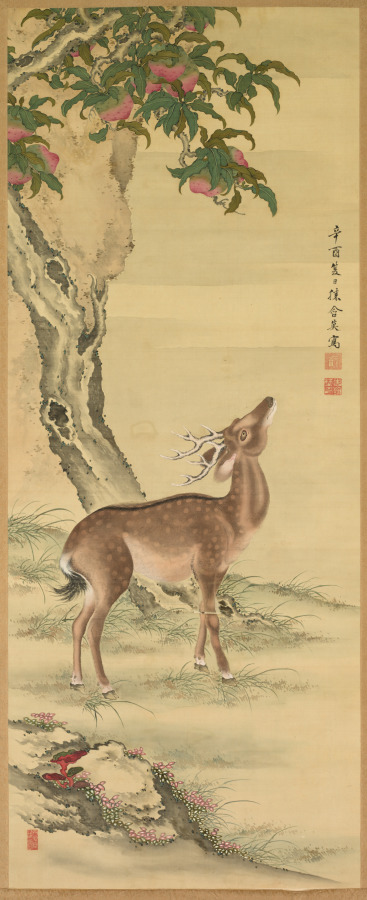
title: Symbols of Longevity: Deer under Peach and Pine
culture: Japan, Edo period (1615–1868)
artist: Toda Tadanaka (Japanese, 1761–1823)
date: 1801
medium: Pair of hanging scrolls; ink and color on silk (ivory roller ends)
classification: Painting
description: This pair of hanging scrolls is replete with images symbolizing longevity. Peaches, associated with immortality, hang in abundance from a tree in the left scroll, while pines, known for being eternally green, twist together in the right scroll. Beneath the trees stand two bucks, one of whom gazes at a doe seated on the ground as he licks his coat. Medicine made from deer antlers is said to promote health. Mushrooms, in bright red and green, seen in the left scroll, are said to confer immortality upon those who eat them, and the small waterfall in the right scroll speaks to the infinite flexibility and abundance flowing through life. Toda Tadanaka, the son of the ruler of Noto province and a military leader himself, trained with trained with Mori Ransai (1740-1801), a painter known for colorful bird-and-flower compositions in the style of Shen Nanping. The style is more generally referred to as the Nagasaki style, indicating the port city in which a number of Chinese painters were active in the Edo period (1615-1868).